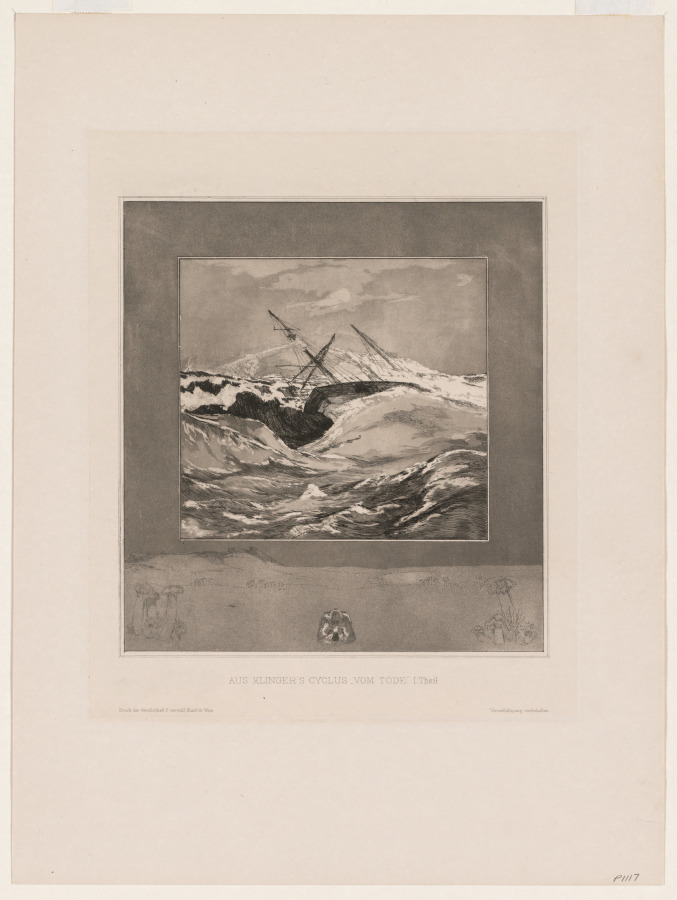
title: Sea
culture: Germany, 20th century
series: On Death, Part I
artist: Max Klinger (German, 1857–1920)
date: 1889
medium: etching and aquatint on chine collé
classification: Print